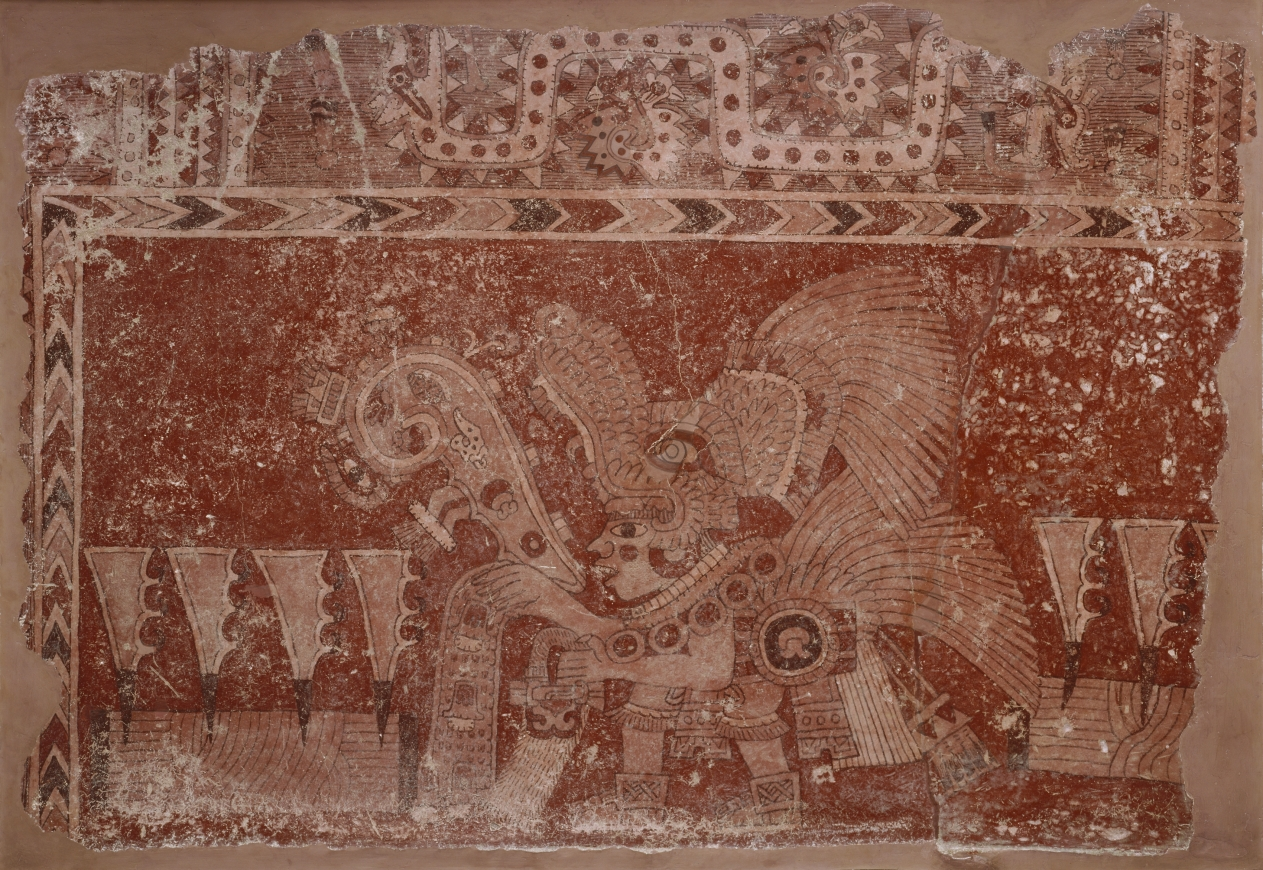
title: Mural Fragment with Elite Male and Maguey Cactus Leaves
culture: Central Mexico, Tlacuilapaxco apartment compound(?), Teotihuacán style, Classic Period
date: 500–550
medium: fresco on wall fragment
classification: Painting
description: This richly dressed elite male belonged to a row of identical figures who processed along the walls of a patio in one of Teotihuacán’s wealthy apartment compounds. He offers a chant or prayer, materialized in a mouth scroll, along with a flower-filled libation that cascades from one hand. In the other hand, he carries an incense bag. The thorny spines of the maguey cactus, in front and behind, may allude to the offering of precious blood and a ritual beverage made from the cactus’s sap (pulque, a less refined form of tequila). The spines are thrust into objects that may represent bundles or plots of land.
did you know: This fragment is from a larger composition that covered the walls of a patio at Teotihuacan.